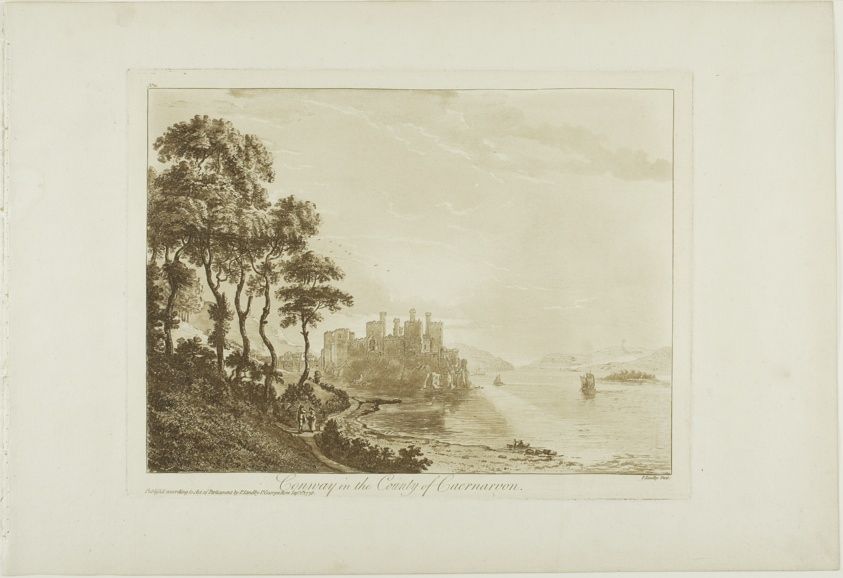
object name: Print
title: Conway in the County of Caernarvon, plate eleven from Twelve Views in North Wales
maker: Paul Sandby (English, 1731-1809)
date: 1776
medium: Aquatint with etching on ivory laid paper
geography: England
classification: etching; print; prints and drawing